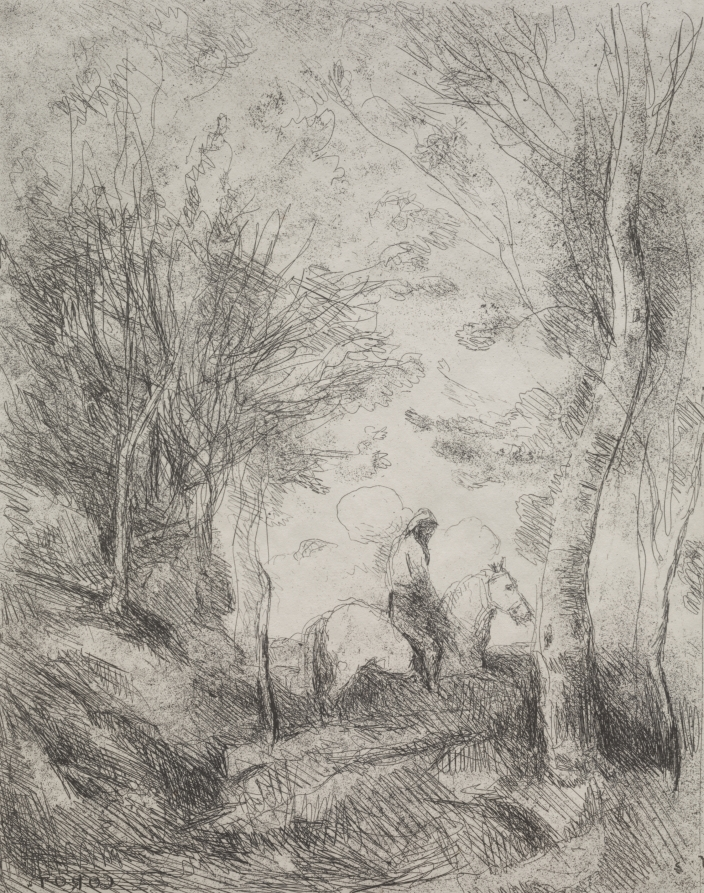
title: The Great Cavalier in the Wood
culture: France, 19th century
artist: Jean Baptiste Camille Corot (French, 1796–1875)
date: original impression 1854, printed in 1921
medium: cliché-verre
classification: Print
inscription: signed: "COROT" in glass plate (in reverse)